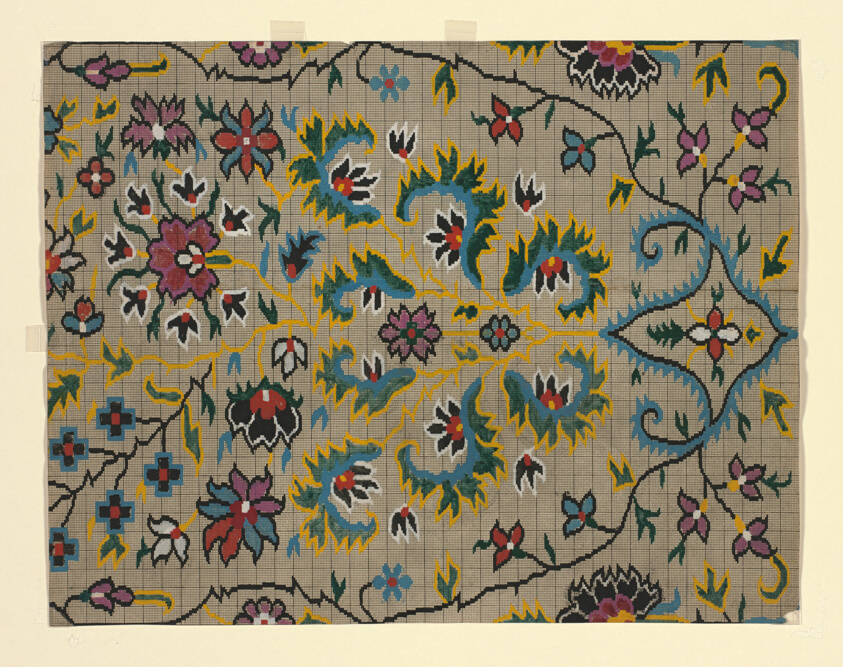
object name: Drawing and Watercolor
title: Mise-en-carte (Point-paper)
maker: France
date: 1760/90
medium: Ink and gouache on hand drawn graph paper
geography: France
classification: textile; accessory - paper design; accessories (object genre)